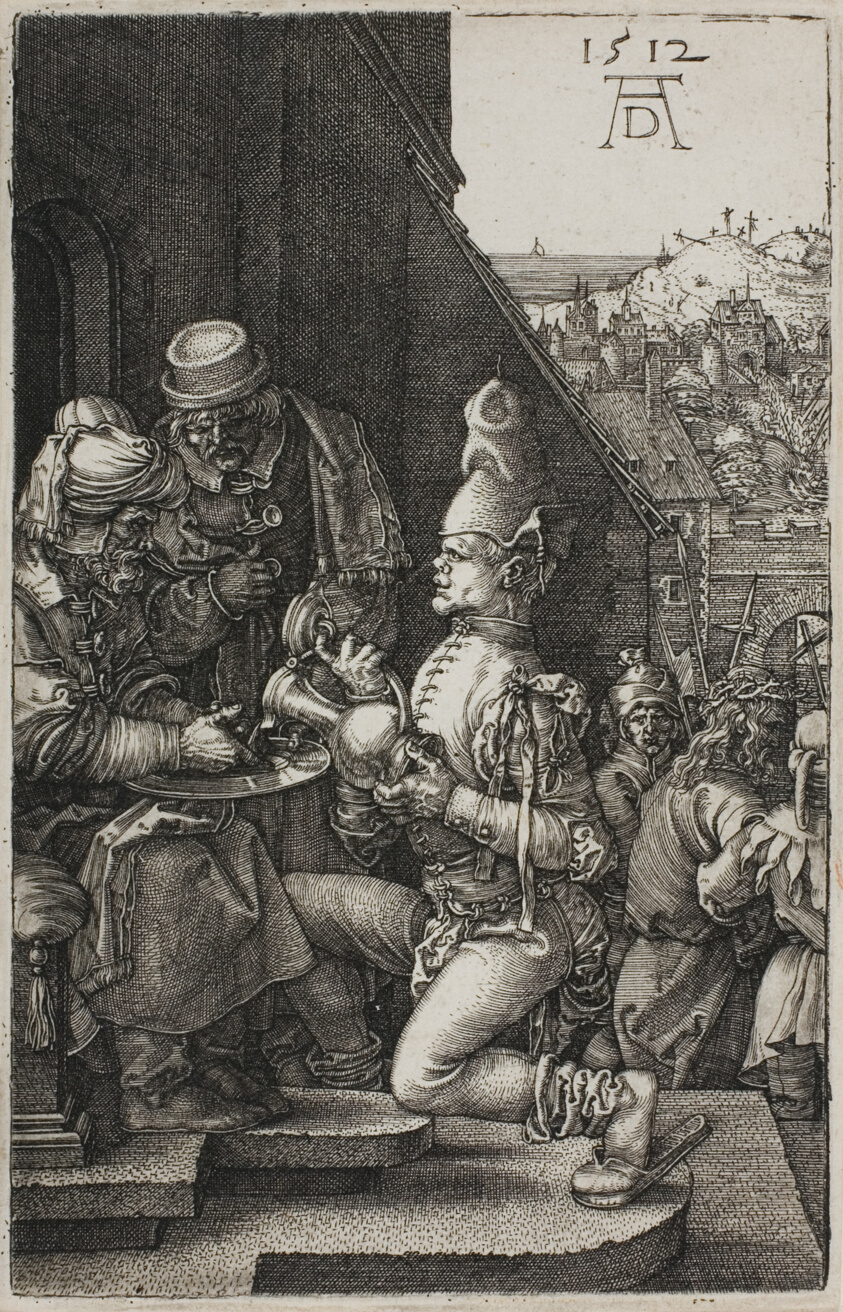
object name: Print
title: Pilate Washing his Hands, from The Engraved Passion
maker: Albrecht Dürer (German, 1471-1528)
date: 1512, published 1513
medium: Engraving in black on ivory laid paper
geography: Germany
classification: engraving; print; prints and drawing; paper